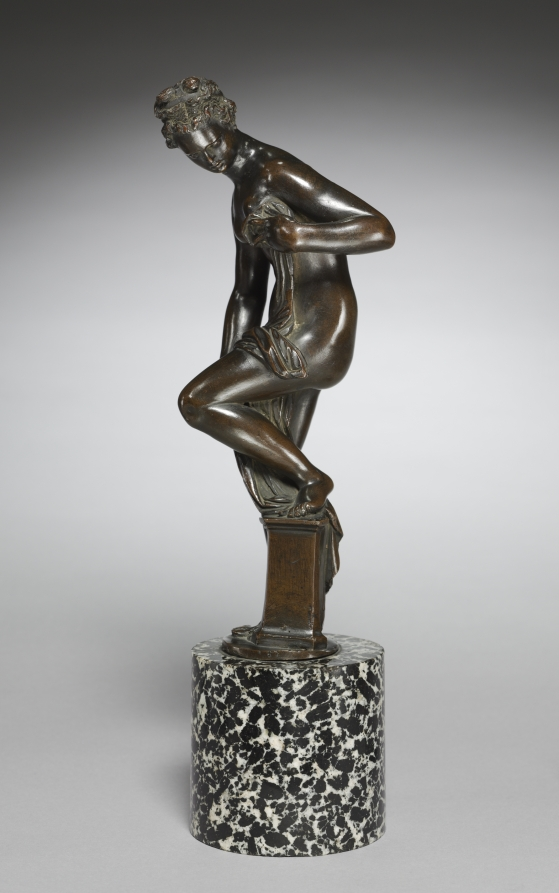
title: Venus after the Bath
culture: Italy, early 17th century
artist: cast possibly by the Workshop of Giambologna (Flemish, active Italy, 1529–1608)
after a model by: Giambologna (Flemish, active Italy, 1529–1608)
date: c. 1600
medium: bronze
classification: Sculpture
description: The statuette’s scale speaks to its likely place in private, intimate settings. The serpentine composition would have encouraged close examination from multiple angles. Compare the complexity of her pose to the relatively static Venus with a Burning Urn (1948.171).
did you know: Giambologna intended his bronze statuettes to be held and touched, to fully appreciate their smooth, elegant forms.